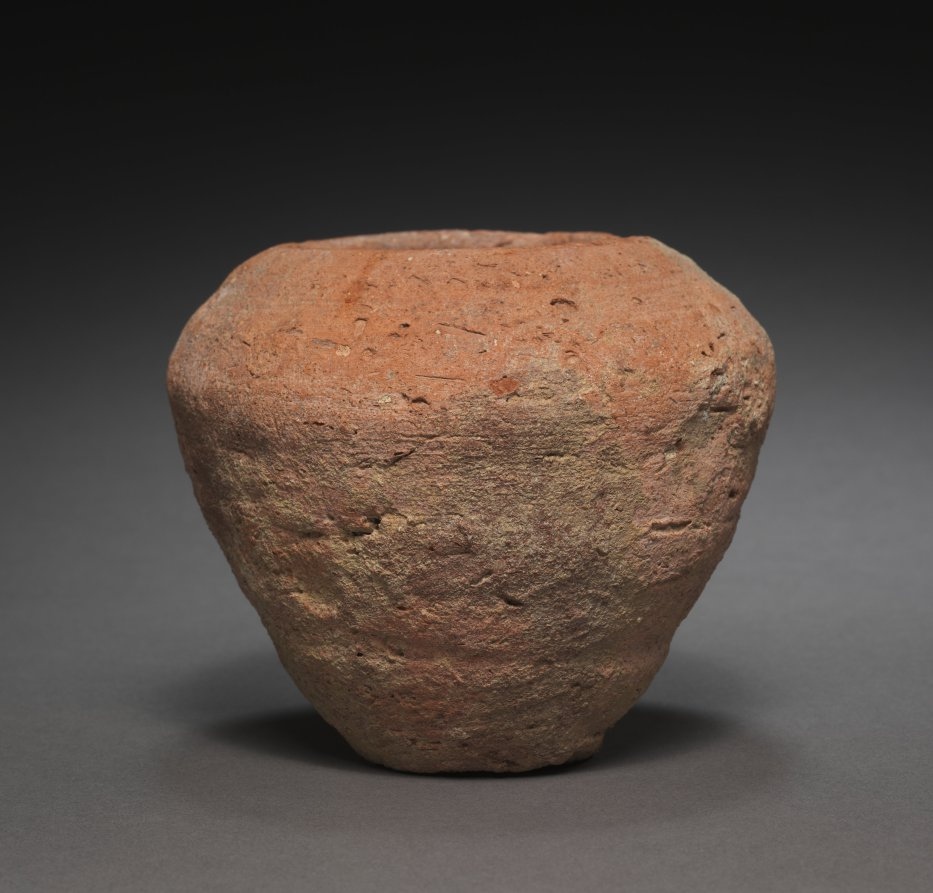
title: Spouted Jar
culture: Egypt, Middle Kingdom (2040–1648 BCE)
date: 2040–1648 BCE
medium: Nile silt ware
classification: Vessels